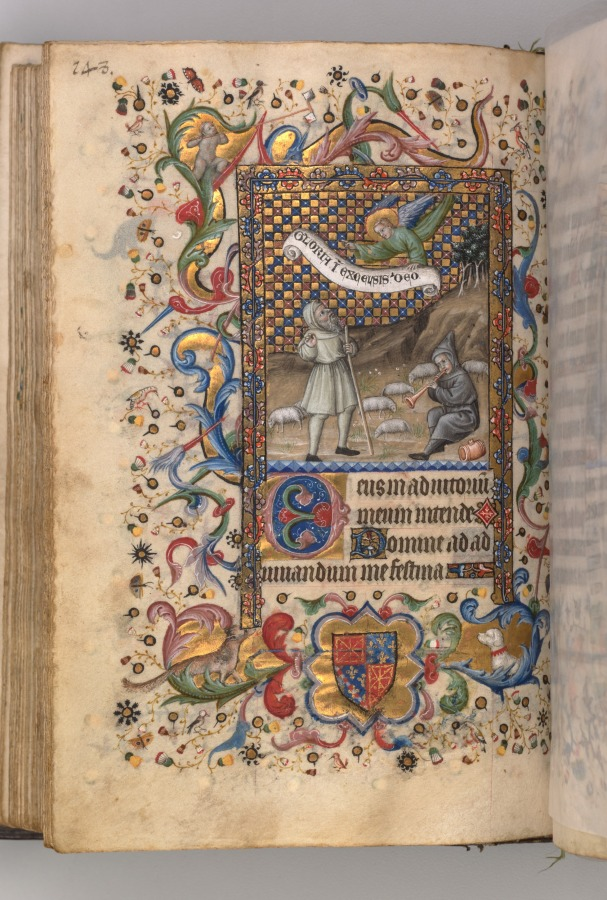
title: Hours of Charles the Noble, King of Navarre (1361-1425): Annunciation to the Shepherds (Tierce), fol. 74 (verso)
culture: France, Paris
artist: Master of the Brussels Initials and Associates (French)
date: c. 1405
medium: ink, tempera, and gold on vellum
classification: Bound Volume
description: This precious volume was obviously highly prized by its owner, the French-born King of Navarre, who had his coat of arms painted on no less than twenty folios. Rather than directly commissioning this manuscript from a specific workshop, it seems that Charles the Noble acquired his book of hours -- perhaps ready-made for the luxury market -- while on a trip to Paris in 1404-05. A collaborative effort, six painting styles are evidenced within the pages of this codex, those of two Italians, two Frenchmen, and two Netherlanders. The painter who was responsible for the planning and decoration of the book, and who produced seventeen of the large miniatures, was a Bolognese artist known as the Master of the Brussels Initials. His principal assistant, responsible for most of the borders, was a Florentine who signed his name "Zecho" da Firenze on folio 208 verso.